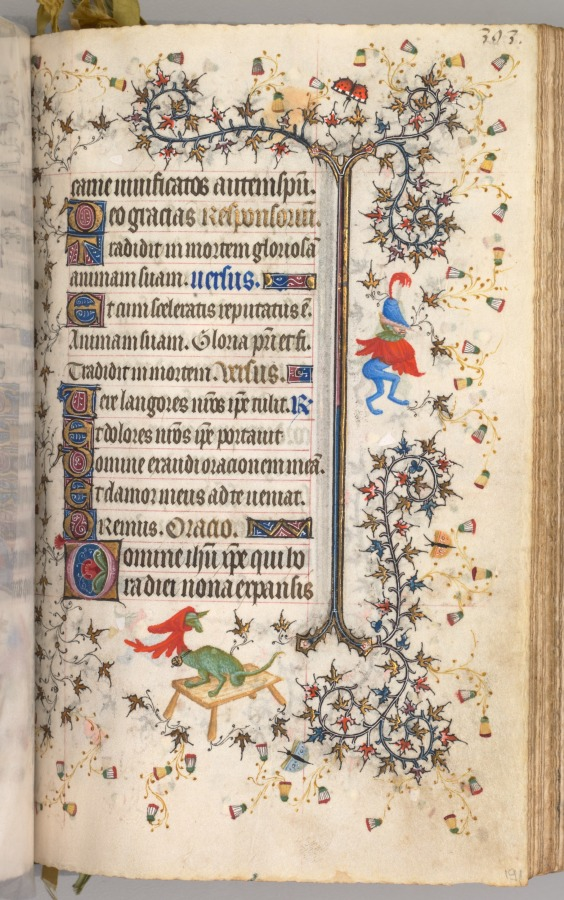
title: Hours of Charles the Noble, King of Navarre (1361-1425): fol. 191r, Text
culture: France, Paris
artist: Master of the Brussels Initials and Associates (French)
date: c. 1405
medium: ink, tempera, and gold on vellum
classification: Bound Volume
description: This precious volume was obviously highly prized by its owner, the French-born King of Navarre, who had his coat of arms painted on no less than twenty folios. Rather than directly commissioning this manuscript from a specific workshop, it seems that Charles the Noble acquired his book of hours -- perhaps ready-made for the luxury market -- while on a trip to Paris in 1404-05. A collaborative effort, six painting styles are evidenced within the pages of this codex, those of two Italians, two Frenchmen, and two Netherlanders. The painter who was responsible for the planning and decoration of the book, and who produced seventeen of the large miniatures, was a Bolognese artist known as the Master of the Brussels Initials. His principal assistant, responsible for most of the borders, was a Florentine who signed his name "Zecho" da Firenze on folio 208 verso.